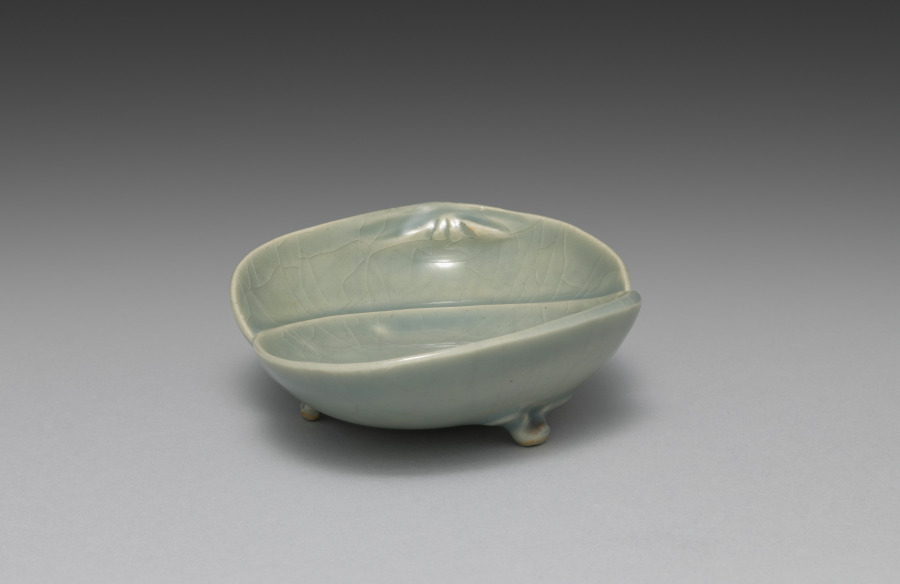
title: Dish from Saucers with Matching Shells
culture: Japan, Meiji period (1868–1912)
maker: Seifū Yohei III (Japanese, 1851–1914)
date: 1893–1914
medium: Porcelain with molded design and green crackled glaze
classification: Ceramic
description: Yohei III’s main output for his sophisticated clientele was in the form of tea sets and dining sets. He created a range of dishes in green glazes. He often produced in pairs, sets of five, or sets of ten. The set of five dishes with a more complex form is described as having a “water-colored glaze” (mizuiroyū). These are shaped like clam half shells, a reference to a game in which shell halves painted with narrative scenes or a variety of motifs must be matched back together by the players. The dishes have molded details to articulate the shell forms, and the crackling across each shell adds another dimension to the surface. Each dish is set on three small feet, formed by a pinched piece of clay and attached to an unglazed area on the underside of the dish. Curiously, while four of the dishes are stamped with the artist’s mark, one has instead a signature carved into the base.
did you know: Each of the paired-shell dishes has its own compartment in a long, flat box.